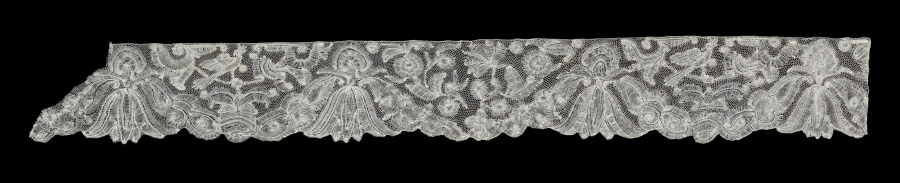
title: Lace Edging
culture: Flanders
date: 1800s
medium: Linen: bobbin lace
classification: Lace